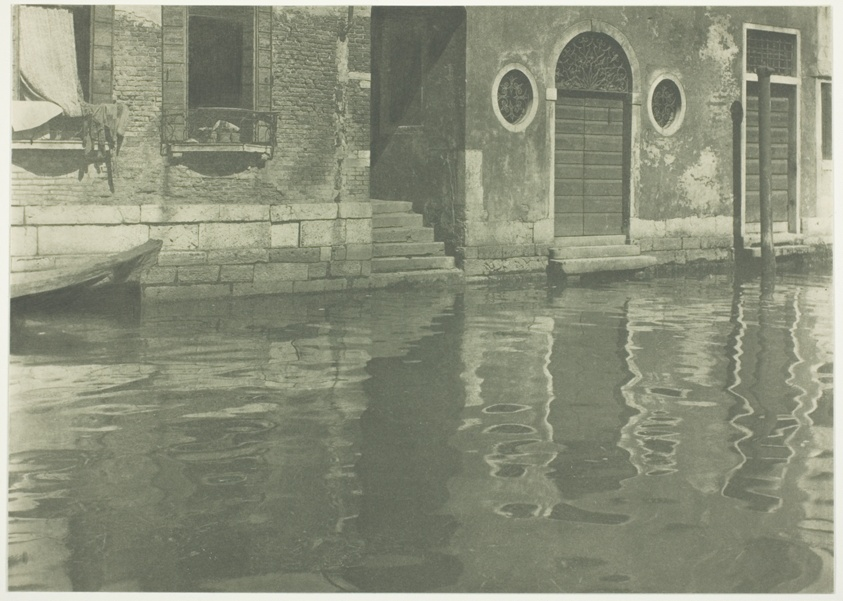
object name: Photograph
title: Reflections—Venice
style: Pictorialism, 19th century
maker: Alfred Stieglitz; American, 1864–1946; Publisher: R. H. Russell; American, Unknown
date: 1894, printed 1897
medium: Photogravure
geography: United States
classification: photogravure; photomechanical process; photography; photograph